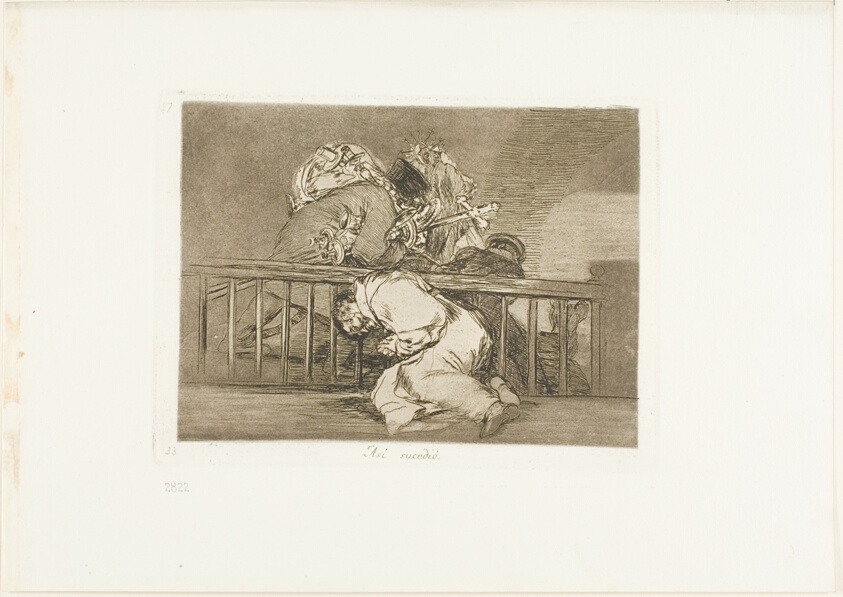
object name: Print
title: This is How it Happened, plate 47 from The Disasters of War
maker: Francisco José de Goya y Lucientes (Spanish, 1746-1828)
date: 1812/15, published 1863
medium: Etching, burnished lavis, drypoint and burin on ivory wove paper with gilt edges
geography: Spain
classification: etching; print; prints and drawing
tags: war